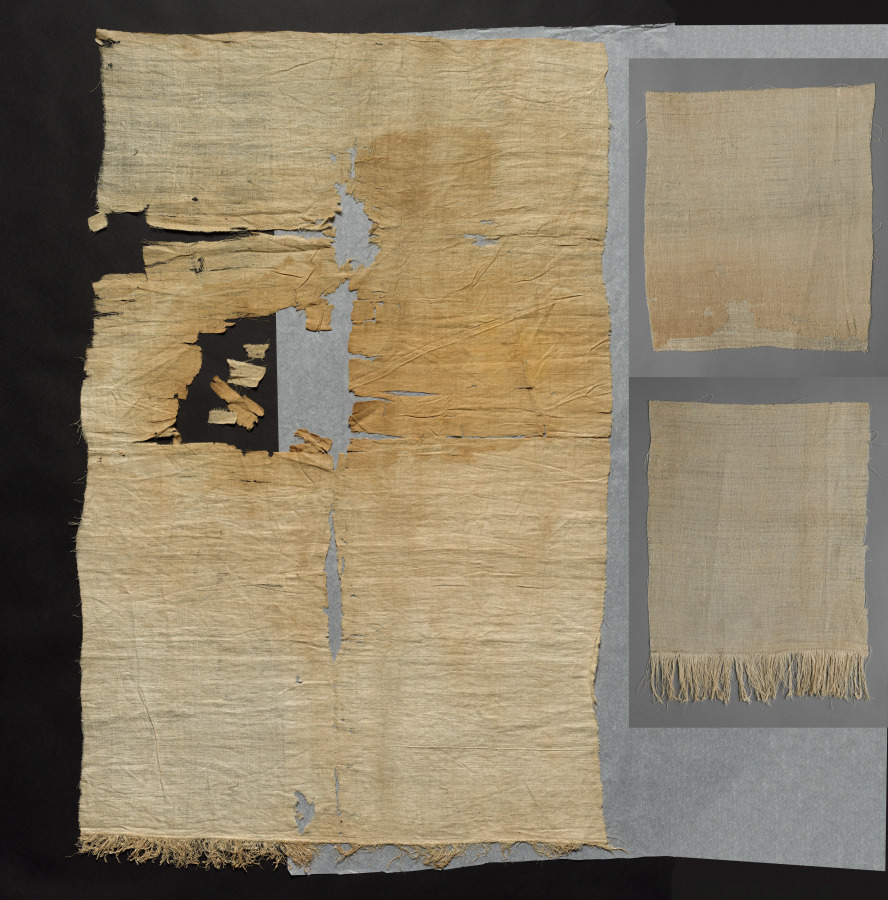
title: Mummy Linen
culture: Egypt, New Kingdom (1540–1069 BCE), Dynasty 18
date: 1550–1291 BCE?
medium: plain weave: linen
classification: Textile